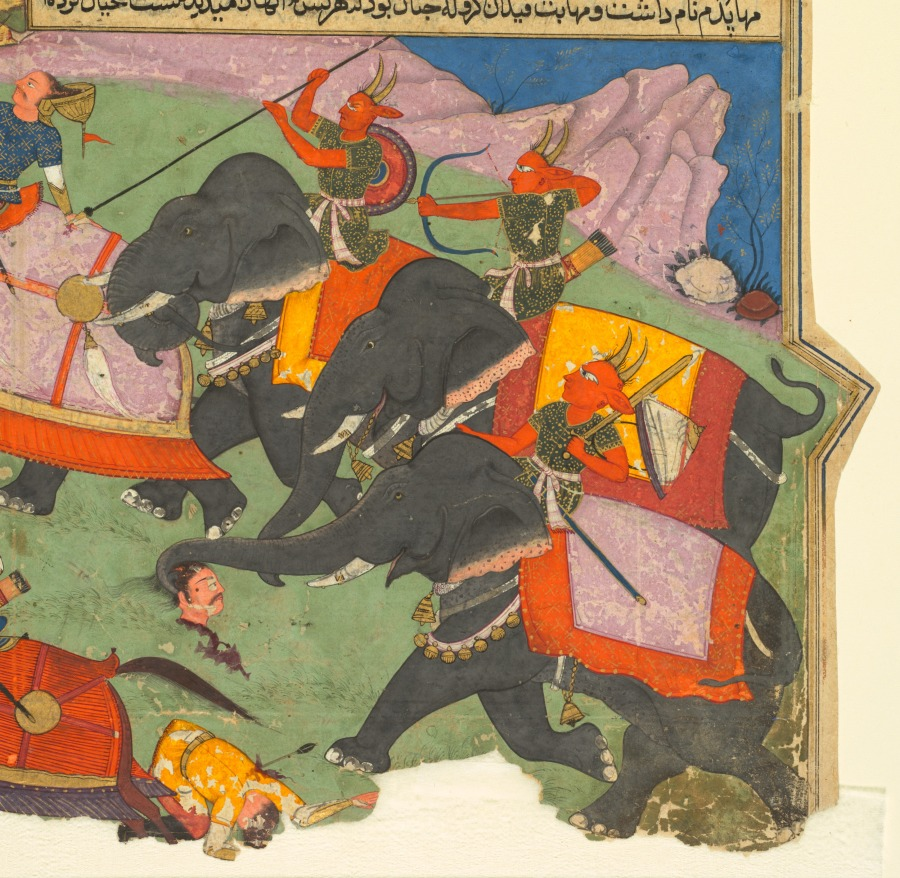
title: Ghatotkacha and three demons in his company chase Bhagadatta, from Bhishma-parva (volume six) of a Razm-nama (Book of Wars) adapted from the Sanskrit Mahabharata and translated into Persian by Mir Ghiyath al-Din Ali Qazvini, known as Naqib Khan (Persian, d. 1614)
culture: Mughal India, court of Jahangir (reigned 1605–27); made for Abd al-Rahim the Khan Khanan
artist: attributed to Fazl (Indian, active early 1600s)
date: 1616–17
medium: Gum tempera, ink, and gold on paper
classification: Painting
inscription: recto: Persian text in naskh script: . . . they were coming near, four four, five five chariots and their riders with one mace. Many elephants were killed. Sahadeva—the son of Jarasandha—drove toward Ashvatthaman and shot so many arrows at Ashvatthaman that Ashvatthaman lost consciousness. His charioteer took him to his father, Master Drona. Master Drona drove toward Sahadeva—the son of Jarasandha—and showered him with arrows; and he too began to wage battle against Drona. Master Drona was about to finish off Sahadeva when Nakula and three demons and three sons of Drupada came to the aid of Jarasandha’s son and began to fight with Master Drona, and Drona was fighting them all victoriously; and after some time the armies mingled together and became a battle for all, and Bhurishravas and Satyaki began to engage in fighting and Duryodhana came from a side and showered Bhima with nine arrows on the side. Bhima told his charioteer: “Drive my chariot carefully against these people for they are charging at me.” The charioteer drove his chariot toward Duryodhana. Bhima shot ten arrows at Duryodhana, and he lost consciousness, and ten brothers of Duryodhana were killed on this day, and the people who were around him scattered away and dispersed from around him. Duryodhana’s brothers, when they witnessed his plight turned at once toward Bhima and showered him with arrows, and Bhagadatta drove his elephant towards Bhima. The remainder of the fourth day from the eighteen days of battle between the Kauravas and the Paṇḍavas And this Bhagadatta had won such fame in the land of valor that he was deemed a black calamity amid calamities sent by God and for His creatures an instrument of swift death. He shot such an arrow at Bhima’s chest that he lost consciousness and fell leaning against the chariot. Bhagadatta grinned and shouted. Ghatotkacha, the son of Bhima, having witnessed this could no longer hold back and himself mounted an elephant he had made by talismanic means and was called Airavata and summoned three other demons, which he had made in his own image, and had them ride three elephants constructed by art, so that from one demon, four demons went toward Bhagadatta, fighting. And among those elephants, one was called Anjana, the second Vamana, and the third Mahapadma. And Ghatotkacha’s elephants had such an awesome presence that whoever saw them imagined them in rut and from [cont. on verso]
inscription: Verso: text of Ghatotkacha and three demons in his company chase Bhagadatta: Persian text in naskh script: [cont. from recto] them they would flee. Then the demon drove hard all four elephants toward Bhagadatta until they managed to roll him in their trunks and trampled on his elephant. He was shouting out of despair and seeking help. At this time Bhishma noticed him and shouted at his people to come quickly to Bhagadatta’s aid and save him before he expired. Master Drona, with a well-ordered line of troops and choice warriors, came to battle with the demon. And Bhishma had advised Drona that “This demon is in origin born of a demon, and his way of fighting is not like that of human beings, and he knows a great deal about talismans and magic; therefore, you should act cautiously, and in fact I advise you to cease battle with him today so that if he has indulged in talismans and magic, we too can devise trickeries and ruses of our own so that we gain victory over him tomorrow, for as they say, one should treat like with like.” And the advice of the Kauravas was similar to that of Bhishma. But nevertheless Master Drona set out to free Bhagadatta. Back to the story: when Yudhisthira saw that Master Drona had come to fight the demon in order to free Bhagadatta, he came to the aid of the demon who now was fully backed and supported and who bellowed out joyously: “Now that a massive army has come to my aid, where can you take your life to escape from me?” He said this and left Bhagadatta in order to face Drona. Drona remembered Bhishma’s words and thought it inadvisable to fight the demon. Meanwhile, night was drawing close, and so he pulled back his reins, and accompanied by the Kauravas, returned to their tents. When the Pandavas saw that the Kauravas had ceased fighting and returned to their quarters, they too turned their reins toward their tents and returned homeward with cheer and joy and would slap the demon on the back and express their praise and approval. When night fell, Duryodhana came to Bhishma and summoned all the notables and commanders of the Kauravas and said in a woeful and regretful manner: “Having reviewed and examined today’s battle, I have become extremely despondent and despair of you people. Each one of you has the power and strength to tackle an entire body of troops, and it is clear how much power the demon wields. It is a wonder to me that today too you had agreed together to take it easy and ride out the day and were not capable of countering him, and you have gathered your troops and come home. These actions of yours suggest that either you are not loyal to and bonded with me, or that you just lack strength. How can we believe the latter hypothesis? So we are left with the first hypothesis. So please explain so that I can arrive at another solution.” Bhishma responded to this on behalf of all of them, and said: “Although if you hear the truth from me or from any other person, you will not deem it acceptable, nevertheless since you have posed the question, one must respond out of necessity. I told you at the beginning and tell you again now that Pandavas belong to another breed of people, and overcoming them is no business of yours or ours, for since they have overcome Indra, and Madhu the demon has gained credit from them and taught them magic and sorcery, it would be impossible for the king to overcome them in battle. At most what we are capable of is to indulge in some skirmishes with them and play for time and try to save ourselves from their calamity. Therefore, it would be fitting if you would now see reason and make peace with them on their terms since nothing has yet happened, and the door to reconciliation is open, and what Madhu the demon has related of Krishna and Arjuna––he has said that these two are the Nara and Narayana of the time––you have . . .”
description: The red demons riding elephants were magically generated in multiples by Ghatotkacha, the son of one of the protagonists of Book of Wars. Though created by magic, the elephant-riding demons still caused problems for their adversaries and forced them to retreat. This scene took place on the fourth of 18 days of heated battle. The Mughal emperor Akbar (reigned 1556–1605) commissioned a translation of the ancient Sanskrit epic Mahabharata into the Mughal court language of Persian and distributed copies to members of his court. He believed that the epic provided insight into how to rule the people of India. The chief minister to both Akbar and his successor, Jahangir, commissioned his own lavishly illustrated copy, from which this page has come.